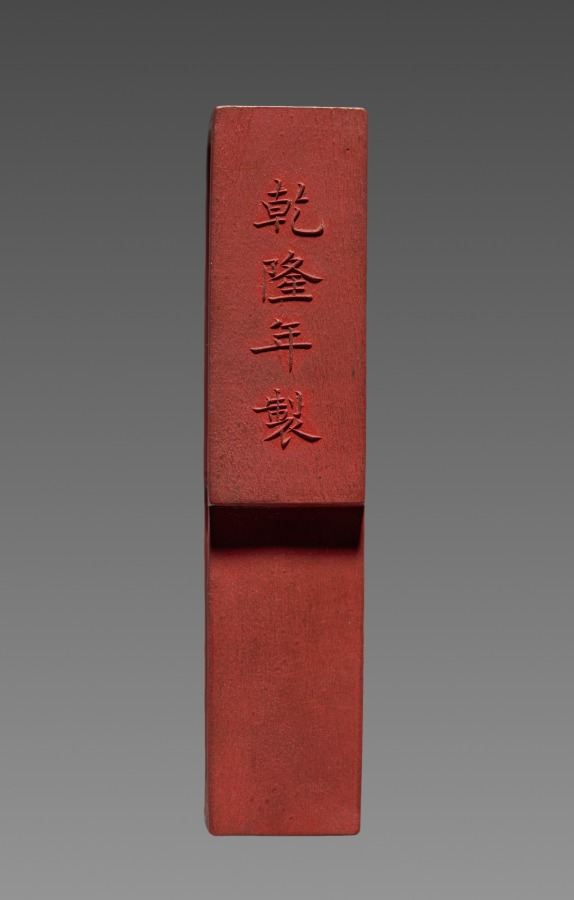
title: Ink Stick from an Imperially Commissioned Set of Ink Stick with Images and Poems of Famous West Lake Sites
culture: China, Qing dynasty (1644–1911), Qianlong reign (1736–95)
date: 1780–94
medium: Molded ink in red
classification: Miscellaneous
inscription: 乾隆年製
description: This is one of ten ink cakes of different shapes and colors stored in an exquisite lacquer box. Each is inscribed in gold with a poem by the Qianlong emperor, praising the ten famous sights of the Westlake in Hangzhou, near Shanghai. The Westlake is famous for its natural beauty; it was a favorite imperial destination and remains a tourist attraction today. Ink cakes (also called ink sticks) are dissolved with the addition of water and ground on the surface of a flat stone into liquid ink for painting and calligraphy. The precious ink cakes here, however, have never been used.